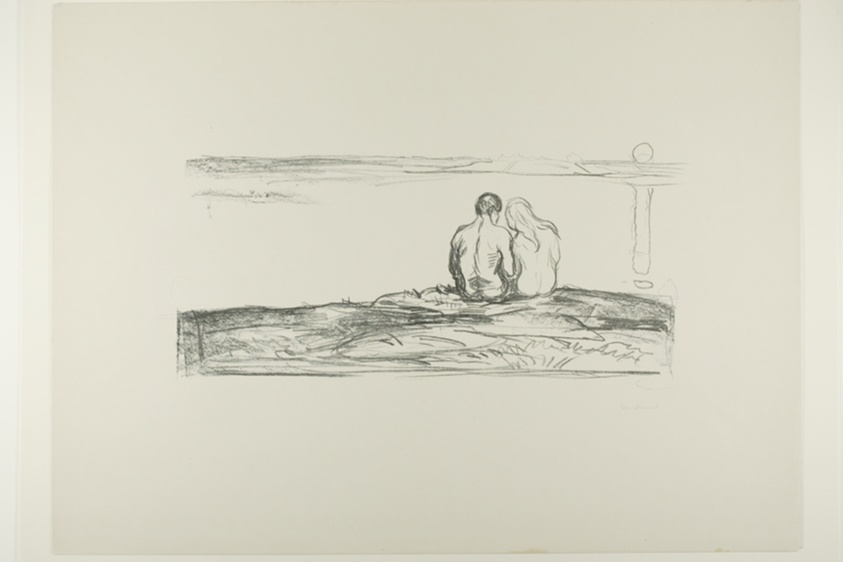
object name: Print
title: Moonrise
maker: Edvard Munch (Norwegian, 1863-1944)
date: 1908/09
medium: Lithograph on paper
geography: Norway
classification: lithograph; print; prints and drawing